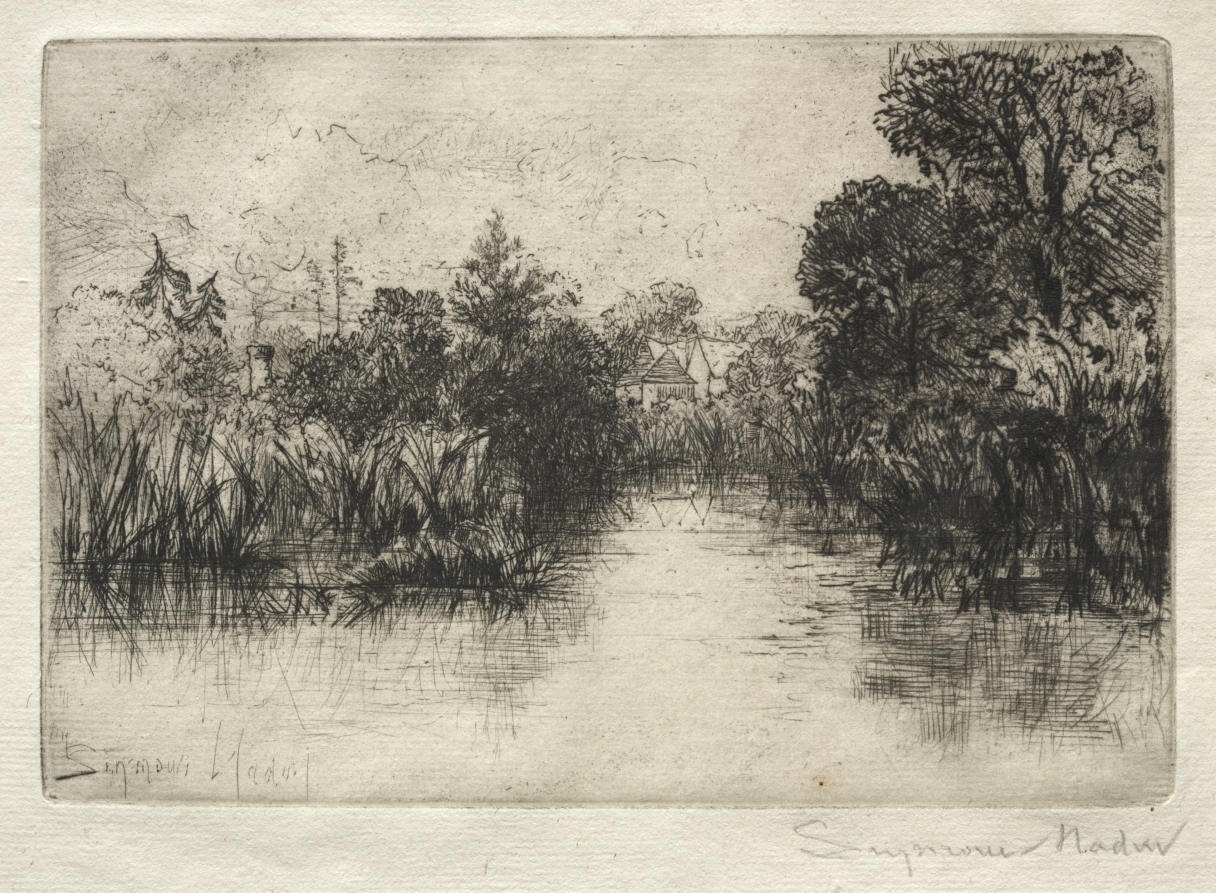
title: Shere Mill Pond (A Small Study)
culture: England, 19th century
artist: Francis Seymour Haden (British, 1818–1910)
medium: etching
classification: Print